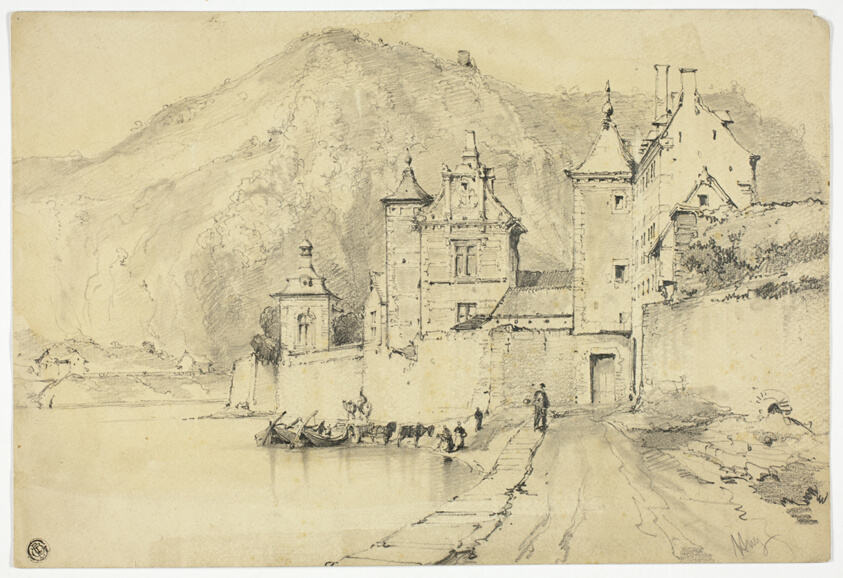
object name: Drawing and Watercolor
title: Town on the Meuse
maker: Arnauld de Vuez (French, 1644-1720)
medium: Graphite, with brush and gray wash, on cream wove paper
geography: France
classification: graphite; paper; drawings (visual works); prints and drawing